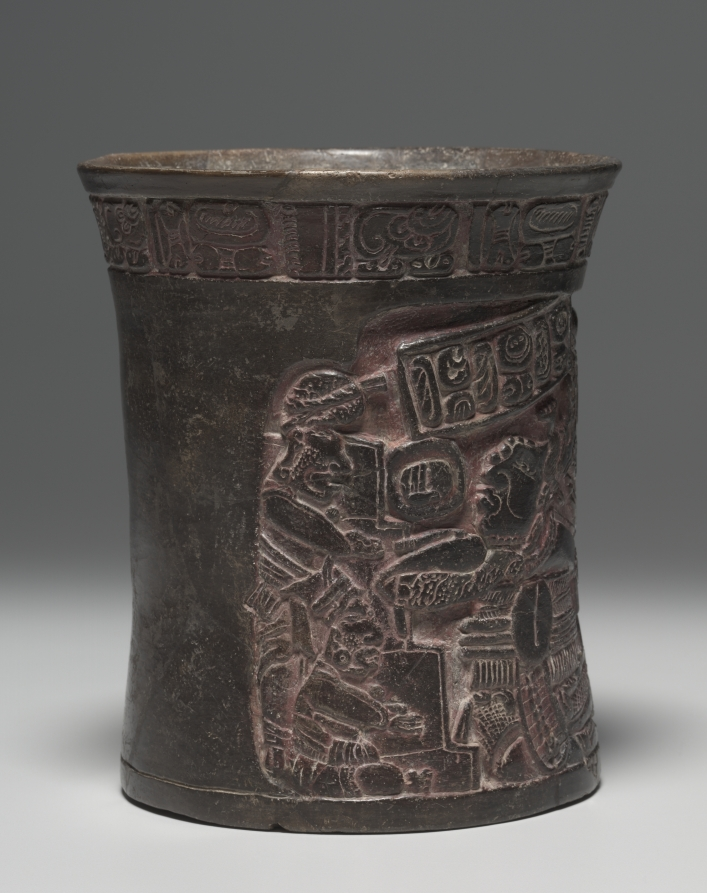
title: Vessel with Ballplayer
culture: Mexico, Yucatán, Maya (Chocholá) style (250-900)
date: c. 600–1000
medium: earthenware, pigment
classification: Ceramic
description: Many Mesoamerican people played ball games, using their hips rather than hands and feet to keep the heavy, solid rubber ball in play. Here a Maya ballplayer, wearing a thick protector to shield his torso from injury, dives to intercept the ball, which hovers in front of his face. The scene is situated within stepped walls, probably those of a ball court.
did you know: This vessel was once broken into 34 pieces before being repaired.